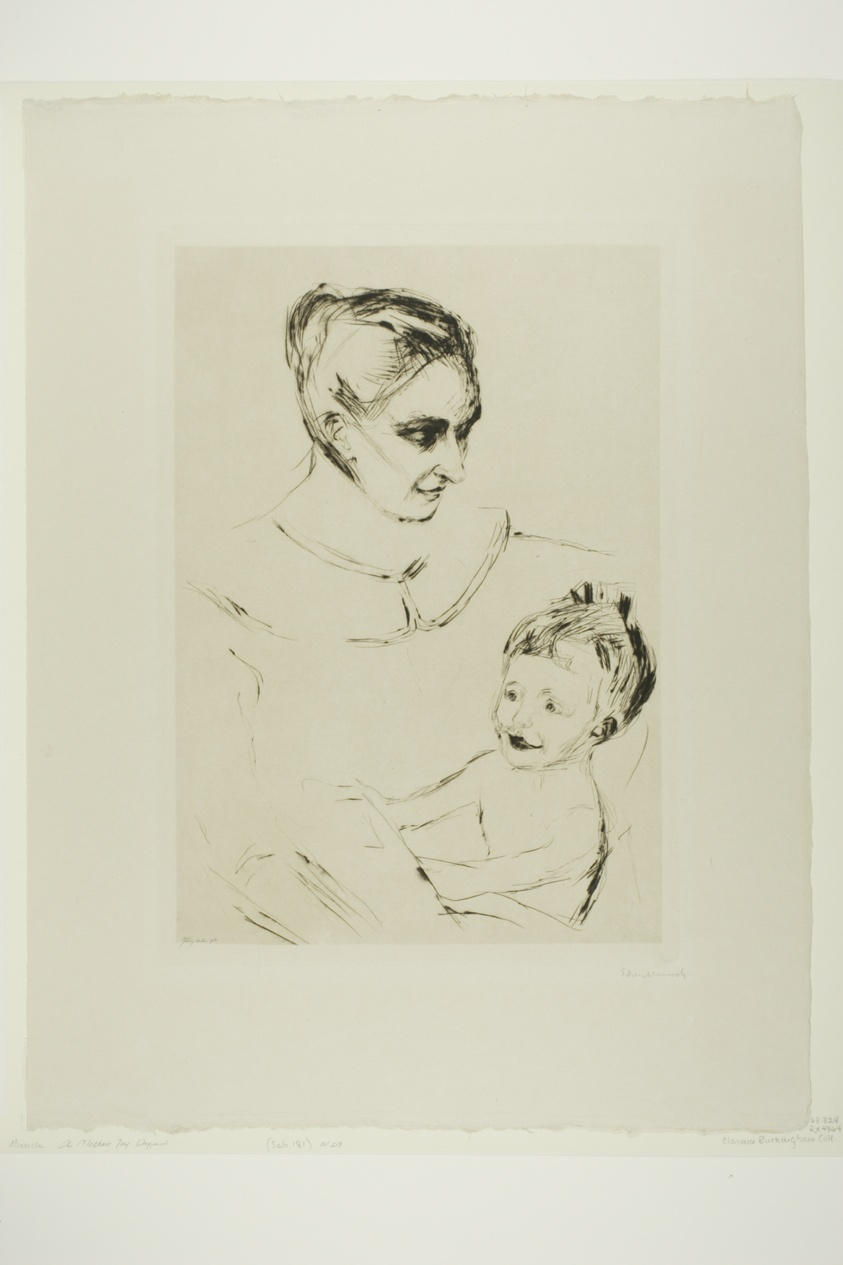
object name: Print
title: A Mother's Joy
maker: Edvard Munch (Norwegian, 1863-1944); printed by Otto Felsing (German, born 1854)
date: 1902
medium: Drypoint on buff wove paper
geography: Norway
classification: drypoint; print; prints and drawing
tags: mothers, children